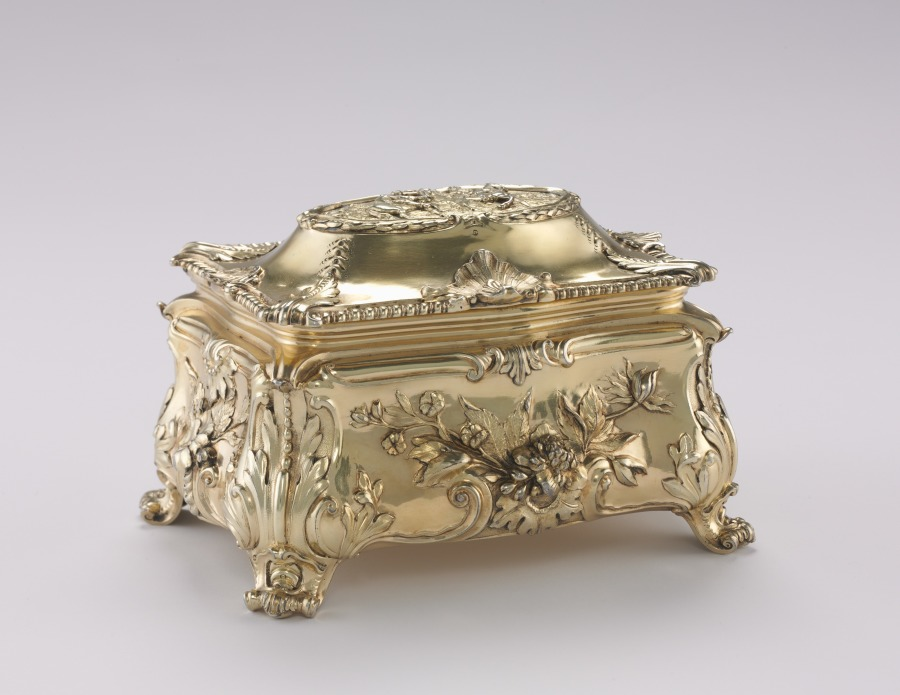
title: Box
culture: England, London, 18th century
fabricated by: Thomas Heming (British, 1722/23–1801)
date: 1771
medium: silver gilt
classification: Silver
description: Produced by King George III’s principal goldsmith, Thomas Heming, this silver gilt box closely resembles those he produced for the Queen of Denmark and the ladies of the British court in the 1760s. Adorning the hinged lid is an unidentified scene along with four scallop shells and acanthus leaves. Similarly, the curvilinear sides are ornamented with an array of swirling flora and serpentine lines.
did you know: This small box likely held jewelry and may have been accompanied by a mirror, scent bottles, brushes, combs, candlesticks, and small covered bowls on a wealthy woman’s dressing table.